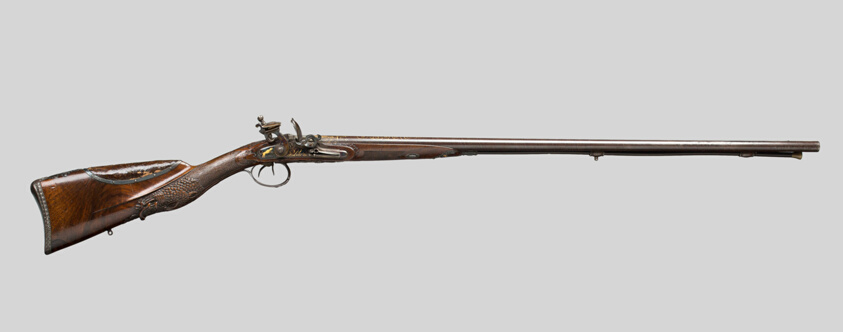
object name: Arms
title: Double-Barreled Flintlock Shotgun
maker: French, Paris; Jean Arlot, active 1764-1818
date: c. 1810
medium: Steel, gold, silver, walnut, leather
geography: Paris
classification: firearm-long gun; arms; arms and armor